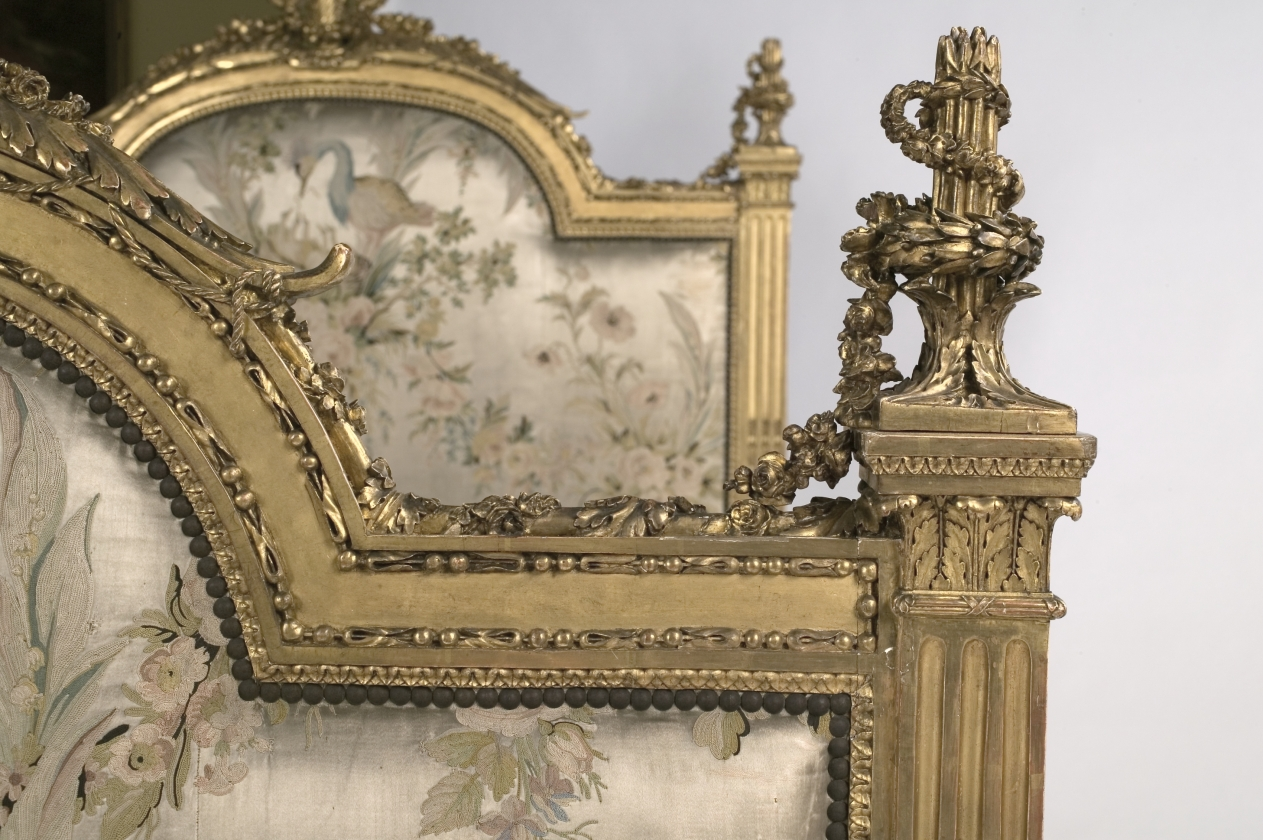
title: Bed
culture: France, 18th century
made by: attributed to Georges Jacob (French, 1739–1814)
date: 1700s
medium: gilded wood and embroidered satin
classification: Furniture and woodwork